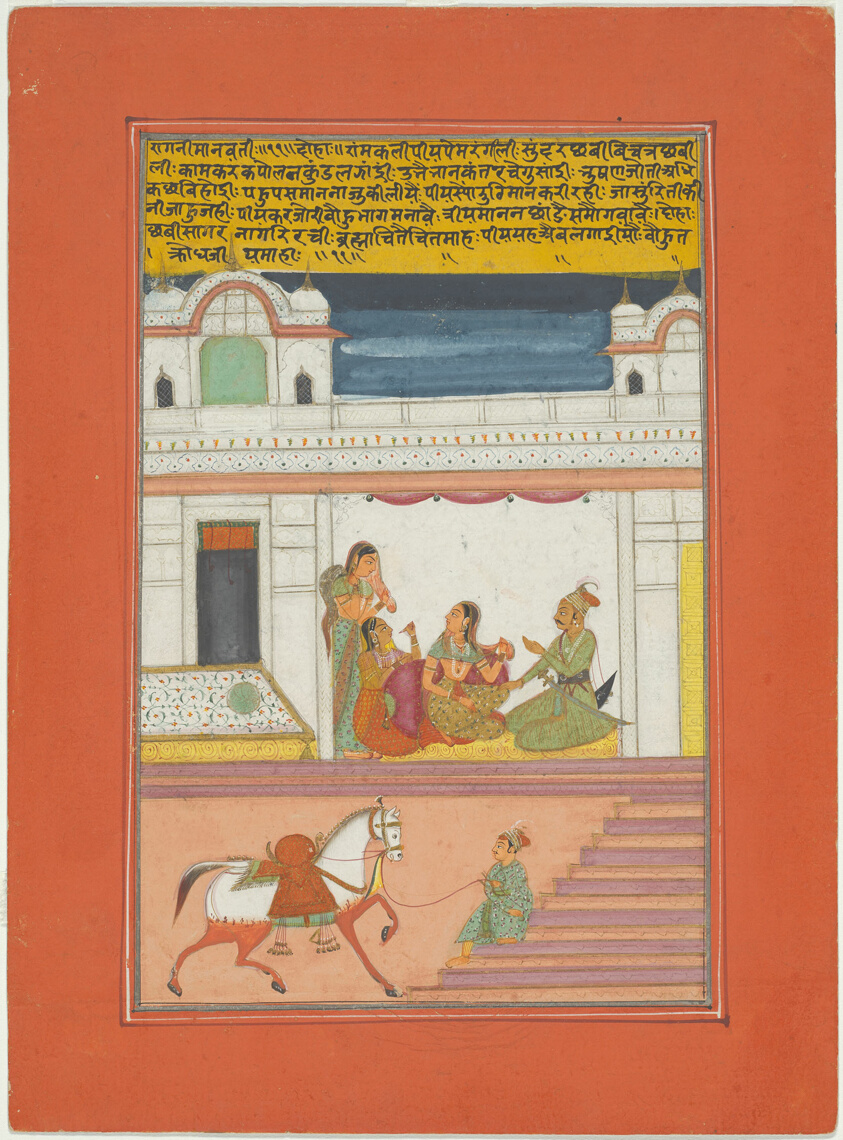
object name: Painting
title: Ragini Manavati, Page from a Jaipur Ragamala Set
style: South Asian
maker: India; Rajasthan, Jaipur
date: c. 1750-1770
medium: Opaque watercolor and gold on paper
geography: Rajasthan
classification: miniature painting; painting; asian art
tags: music, musicians